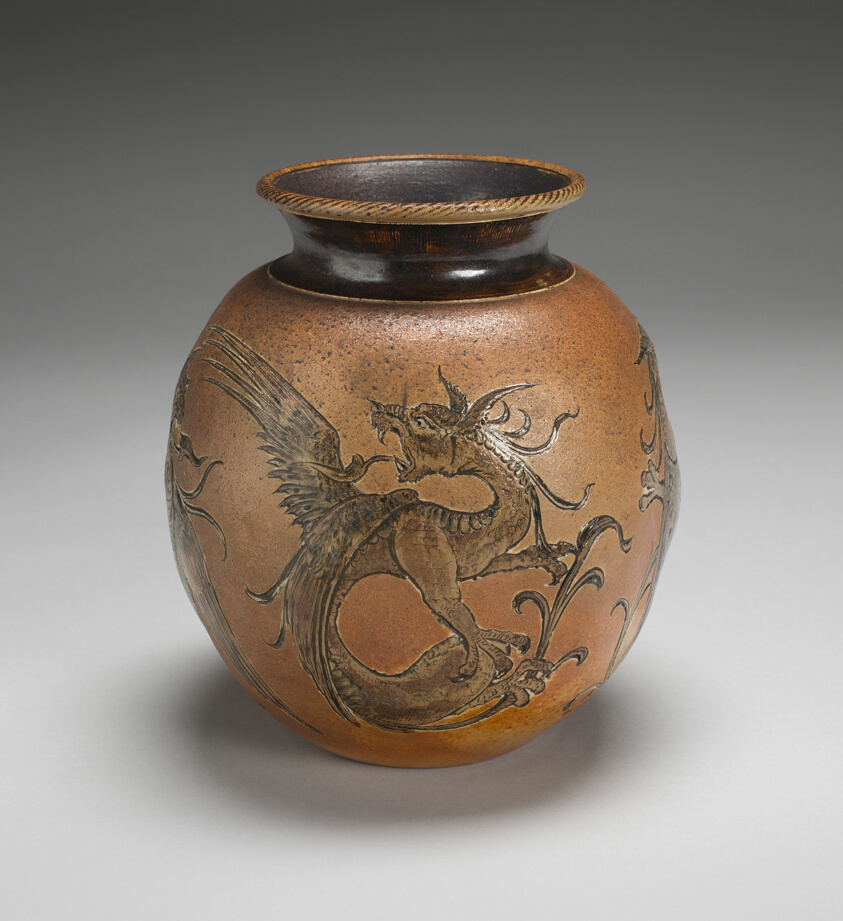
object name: Ceramics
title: Vase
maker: Martin Brothers (English, 1873-1914); England, London and Southall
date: 1894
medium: Salt-glazed stoneware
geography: England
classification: vase; vessel; earthenware; european decorative arts; ceramics